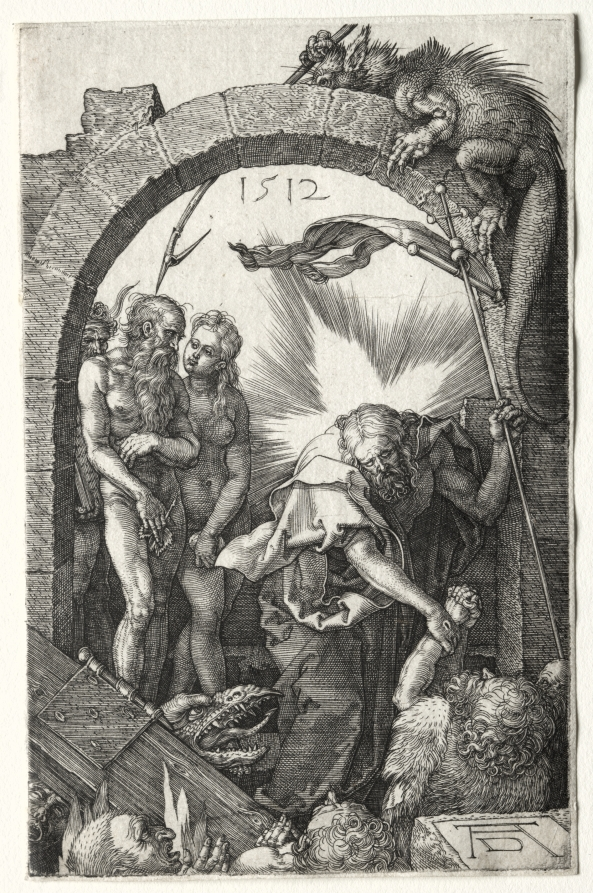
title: Christ in Limbo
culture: Germany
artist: Albrecht Dürer (German, 1471–1528)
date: 1512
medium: engraving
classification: Print